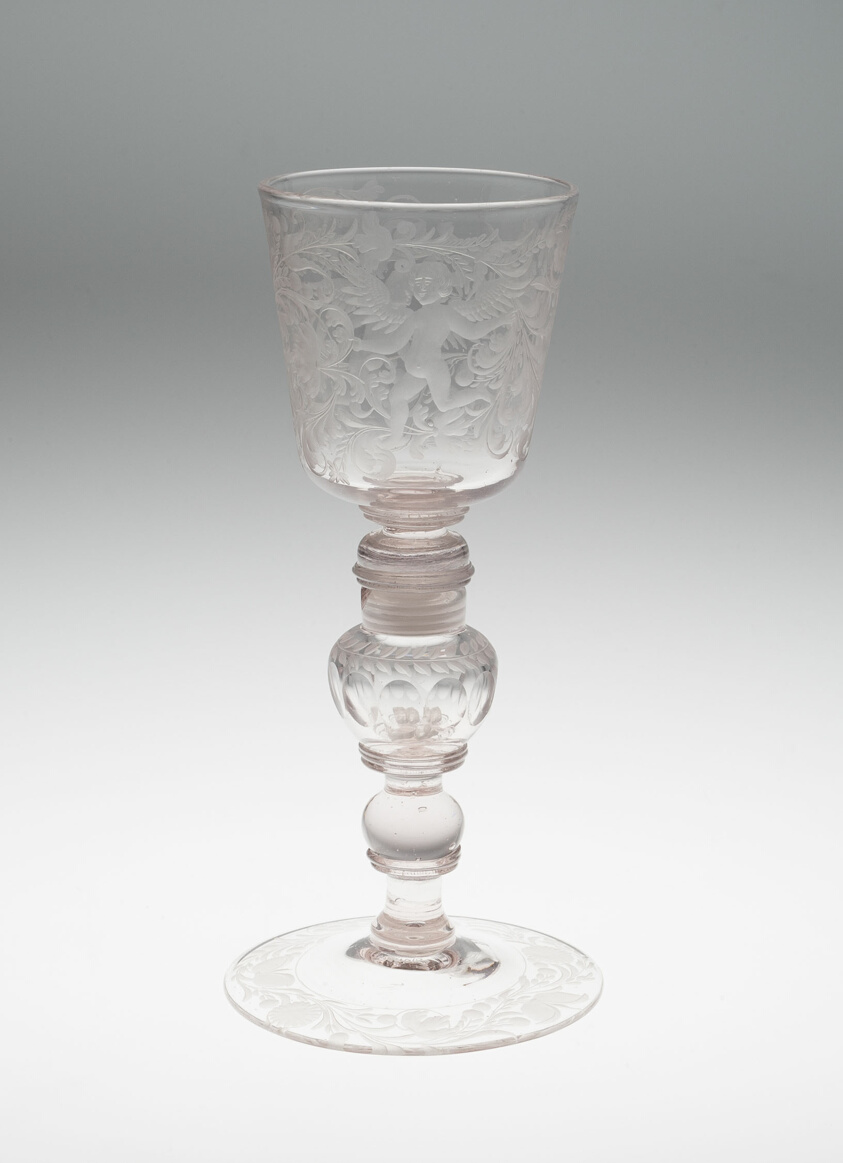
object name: Glass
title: Gaming Goblet with Glass Dice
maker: Probably Bohemia, Czech Republic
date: Late 17th century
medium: Glass; blown with wheel engraved decoration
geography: Bohemia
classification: drinking vessel; glass; european decorative arts